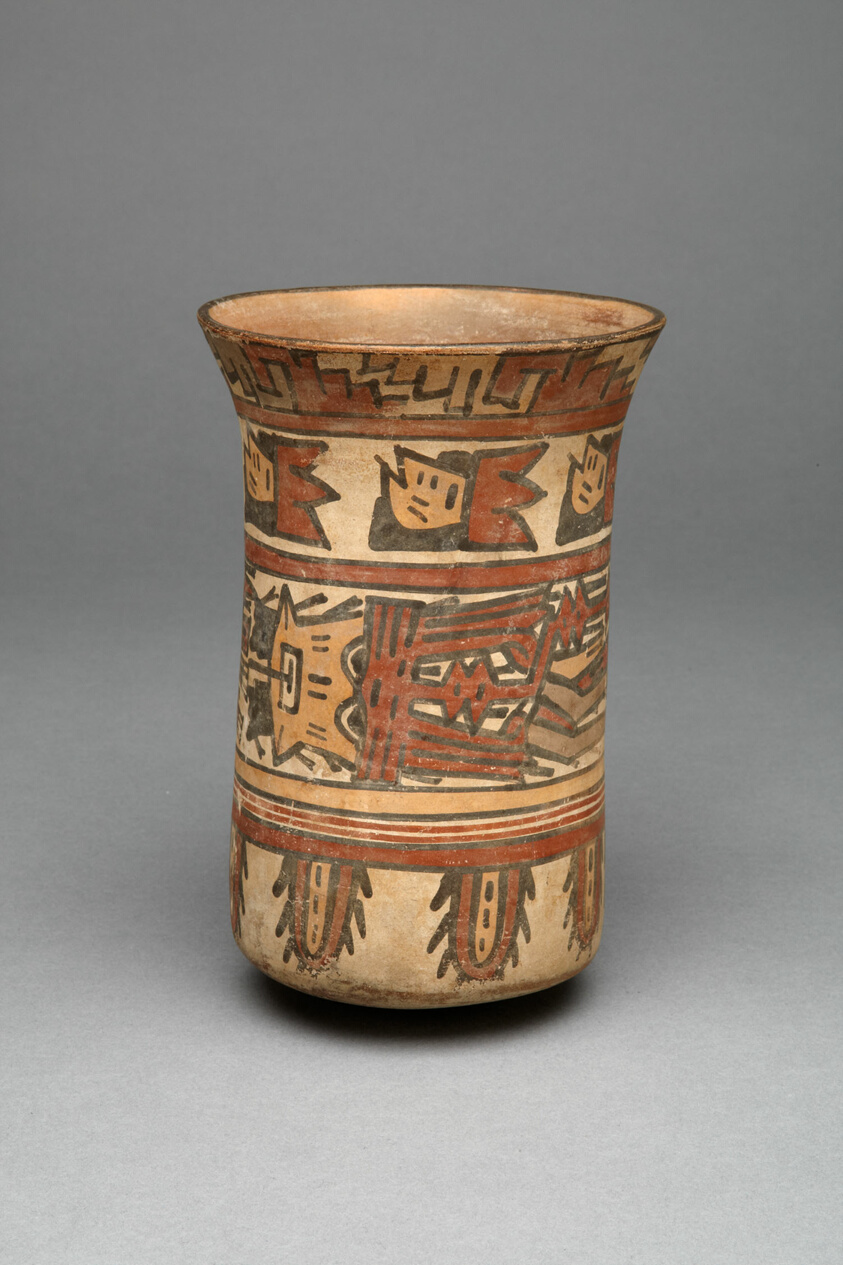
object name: Vessel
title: Beaker with Bands Containing Abstract Motifs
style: nazca, early intermediate period, Pre-Columbian, americas, Arts of the Americas, andean, andes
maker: Nazca; South coast, Peru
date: 180 BCE–500 CE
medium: Ceramic and pigment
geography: Nazca Valley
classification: earthenware; art of the americas; ceramics; vessel